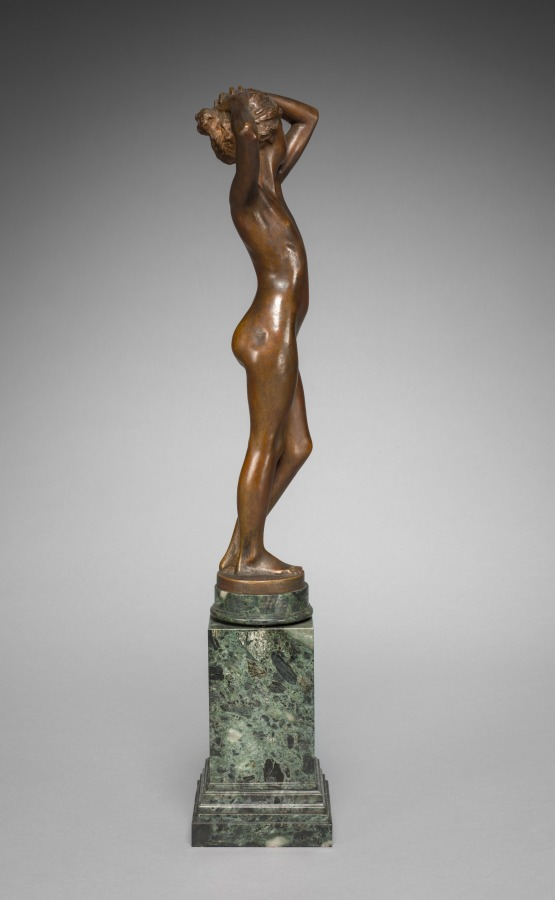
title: Eva, Study of a Nude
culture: America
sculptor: Emil Fuchs (American, born Austria, 1866–1929)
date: 1913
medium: bronze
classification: Sculpture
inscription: Signed on base: EMIL FUCHS 1913